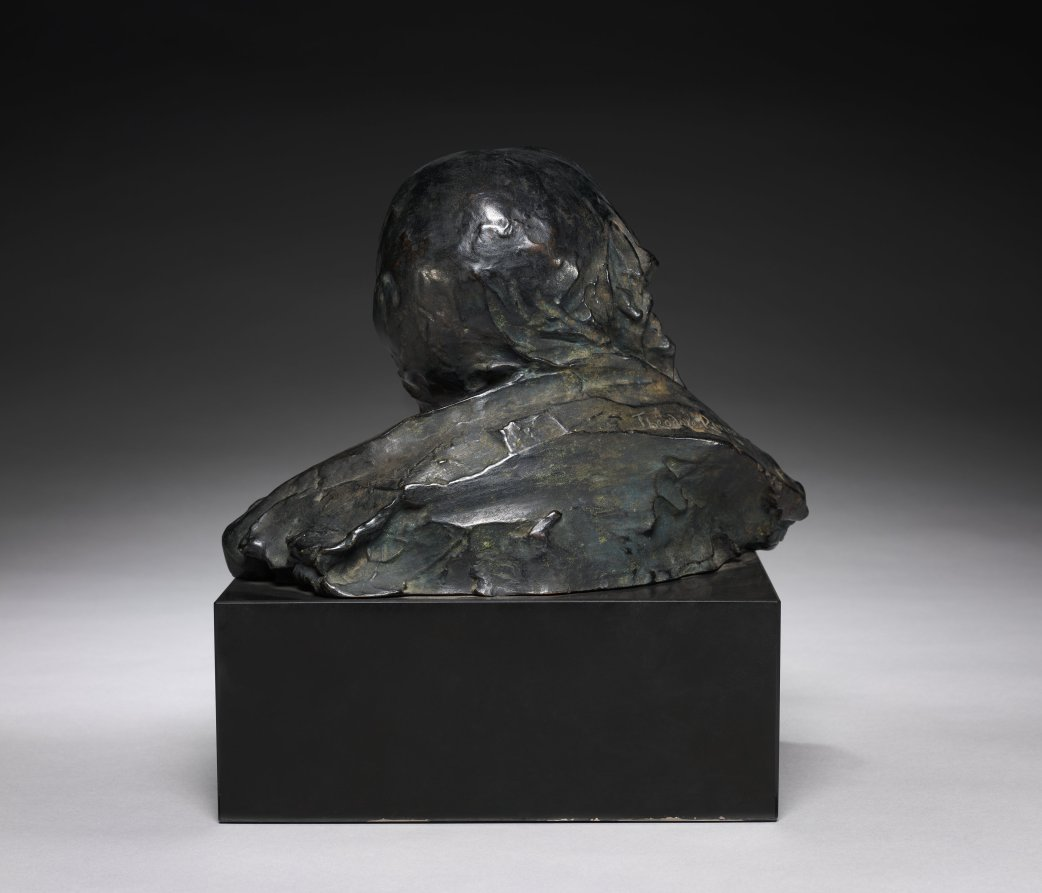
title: Bust of Tolstoy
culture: France, late 19th-early 20th century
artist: Théodore Rivière (French, 1857–1912)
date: d. 1985 – 1905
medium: bronze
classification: Sculpture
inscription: Signed on back of shoulder to left: "Theodore Riviere"